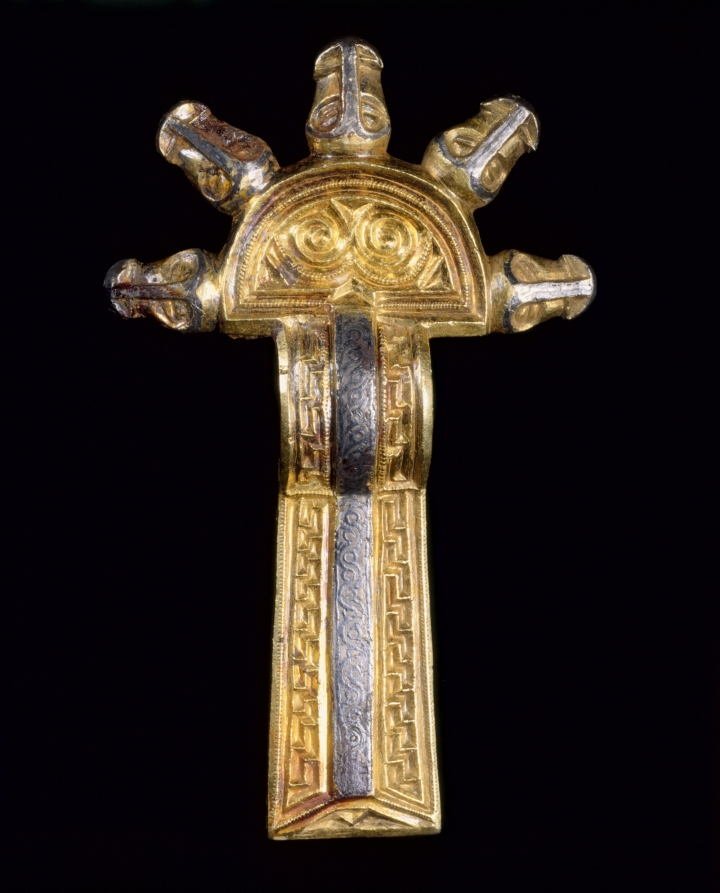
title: Fibulae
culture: Alemannic, Migration Period, 6th-7th century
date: 500s-600s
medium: cast silver, parcel-gilt, with niello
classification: Jewelry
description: A woman of high rank might have worn these twin fibulae on her shoulders, one fastening her inner garment on the right, the other her outer garment on the left. She might also have suspended them from her belt as decorative ornaments